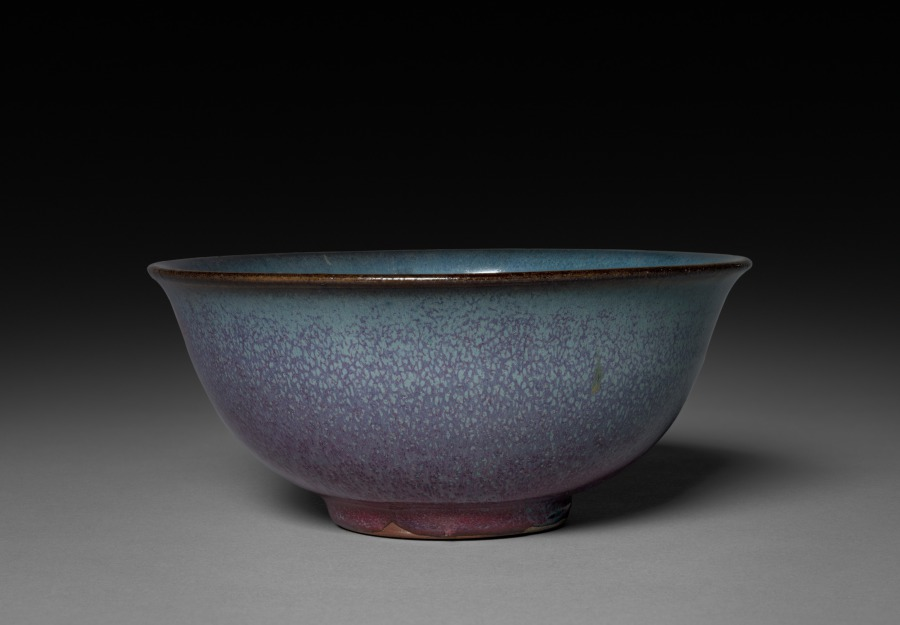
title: Bowl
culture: North China, Yuan dynasty (1271-1368) - Ming dynasty (1368-1644)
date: 1300s–1400s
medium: Glazed gray stoneware, Jun ware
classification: Ceramic